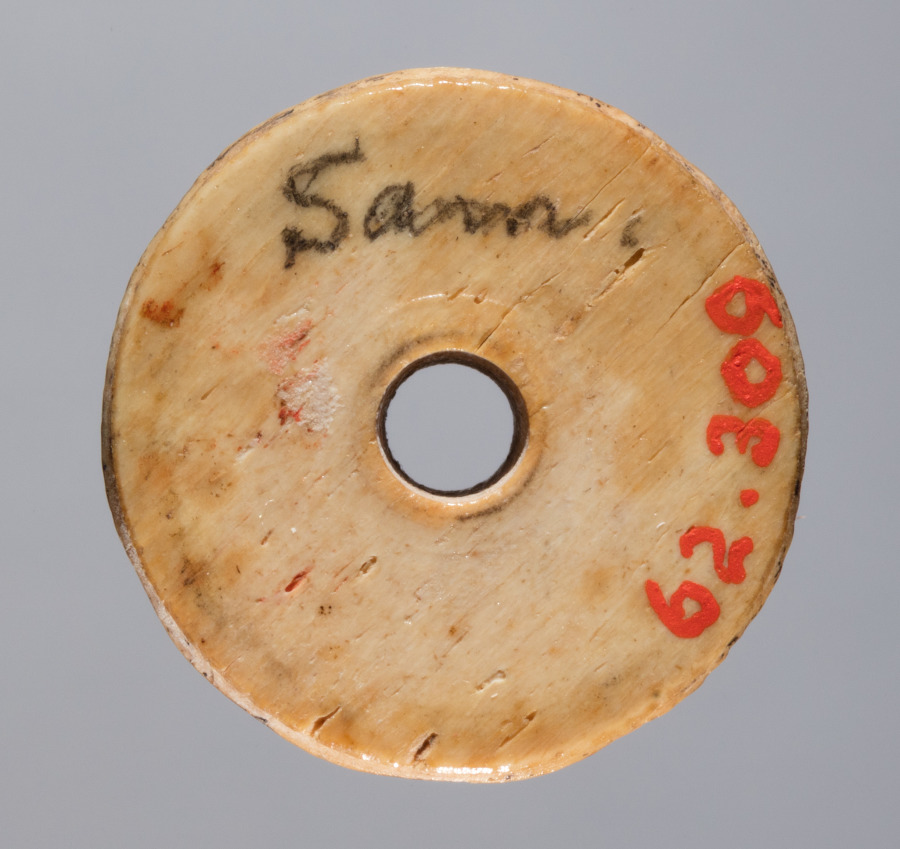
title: Spindle Whorl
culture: Iran, early Islamic period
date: 700s - 900s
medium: bone, incised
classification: Spindle Whorl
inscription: "Sarn" or "Sam" written on bottom by Herzfeld.